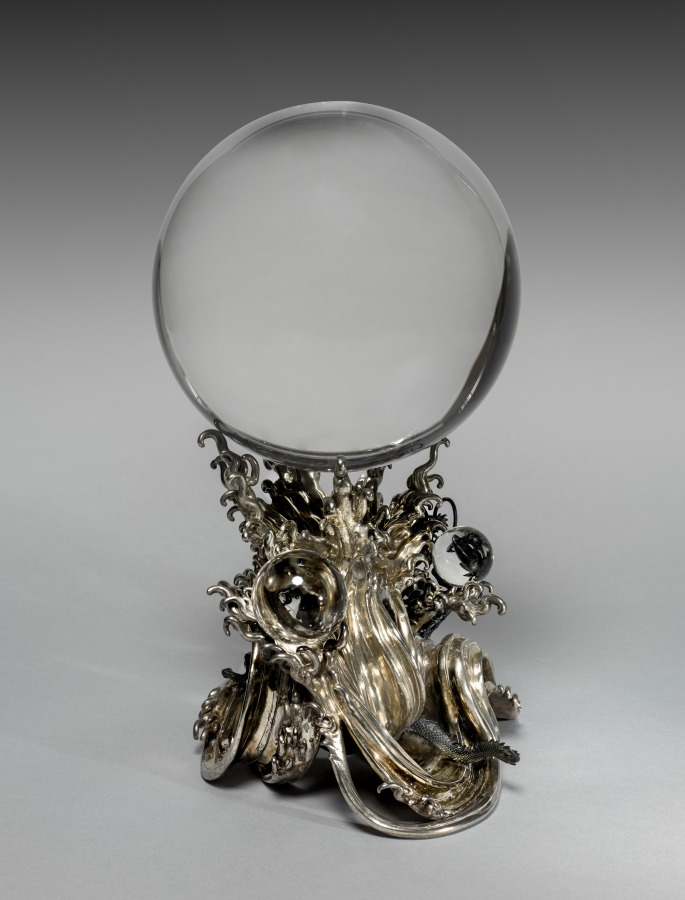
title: Tide-Changing Jewel with Dragon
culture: Japan, Meiji period (1868–1912)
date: early 1900s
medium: silver, shakudō (copper and gold alloy), and crystal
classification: Metalwork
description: An early Japanese legend describes a god of the sea who possesses two jewels responsible for controlling the ebb and flow of the tides. In other legends, the jewels belong to the Dragon King who rules from a palace beyond or beneath the sea. Tales received from China feature dragons that can generate rain by using pearls. This okimono (a small sculptural object without a function) mines imagery associated with these tales while aiming to appeal to the interest in gems and minerals embraced by some Americans and Europeans of the late 1800s and early 1900s.